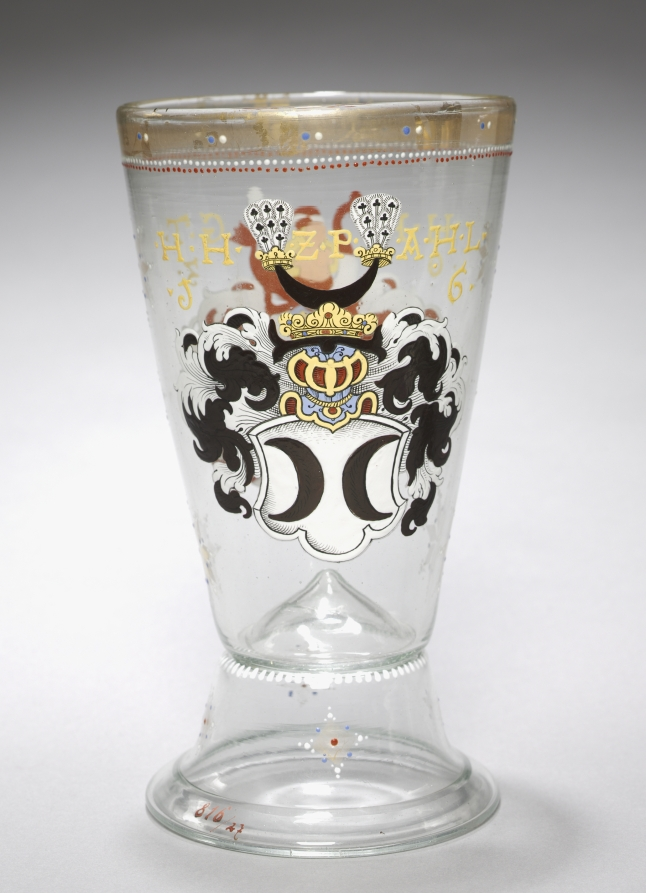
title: Footed Beaker with Two Coats-of-Arms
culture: Germany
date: 1603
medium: enameled glass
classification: Glass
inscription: bears the date: 1603, and unidentified initials.